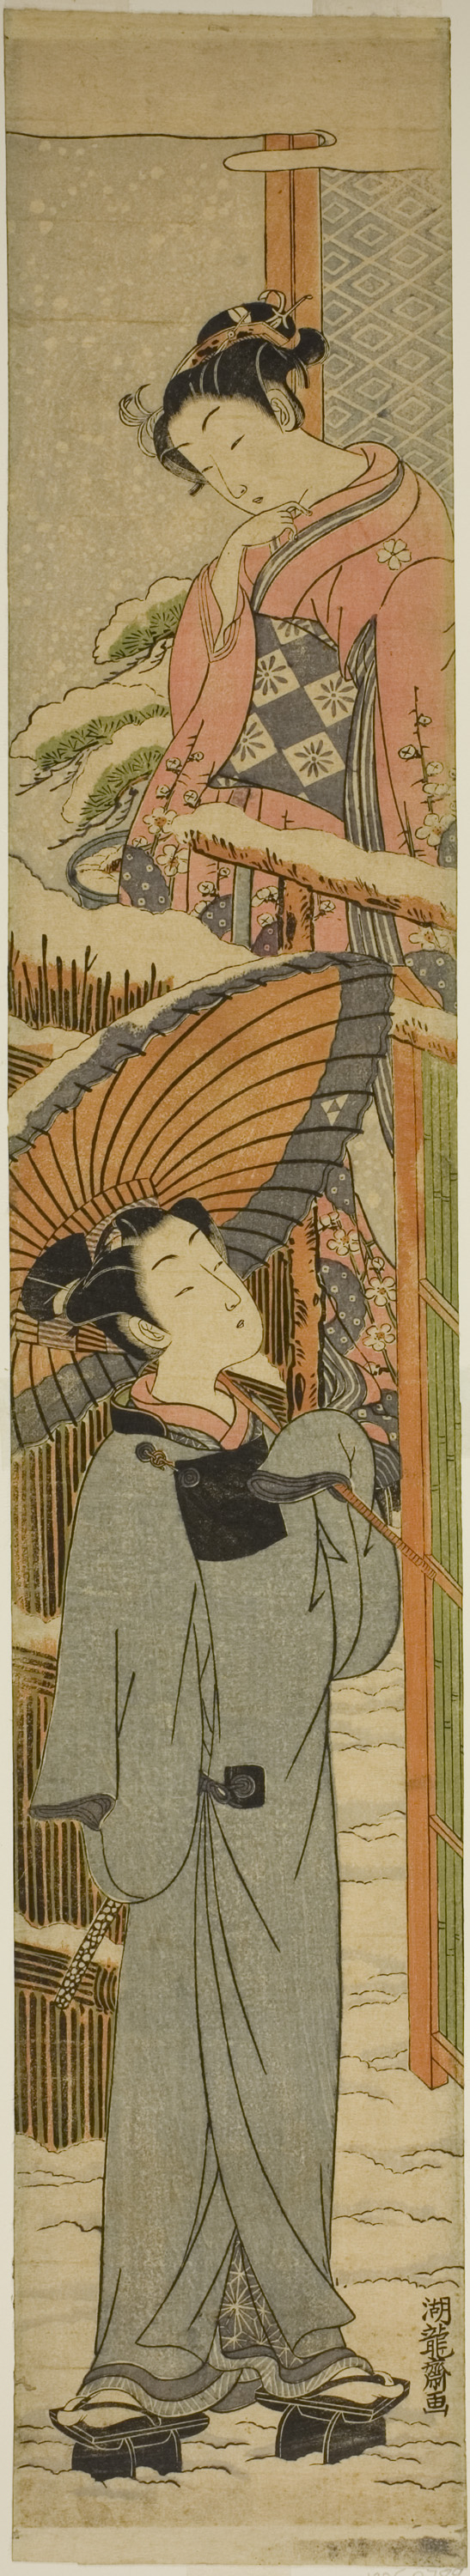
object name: Print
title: Looking through the Gate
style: Japanese (culture or style)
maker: Isoda Koryusai (Japanese, 1735-1790)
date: c. 1771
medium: Color woodblock print; hashira-e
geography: Japan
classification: woodblock print; print; asian art